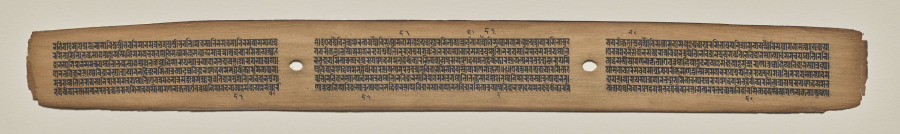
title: Text, Folio 10 (recto), from a Manuscript of the Perfection of Wisdom in Eight Thousand Lines (Ashtasahasrika Prajnaparamita-sutra)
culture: Eastern India, Bihar, Vikramashila Monastery. Painting: Nepal, Kathmandu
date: Sunday, September 14, 1119 (year 239 of the Newar Samvat in the month of Ashvina)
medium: gum tempera and ink on palm leaves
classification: Painting